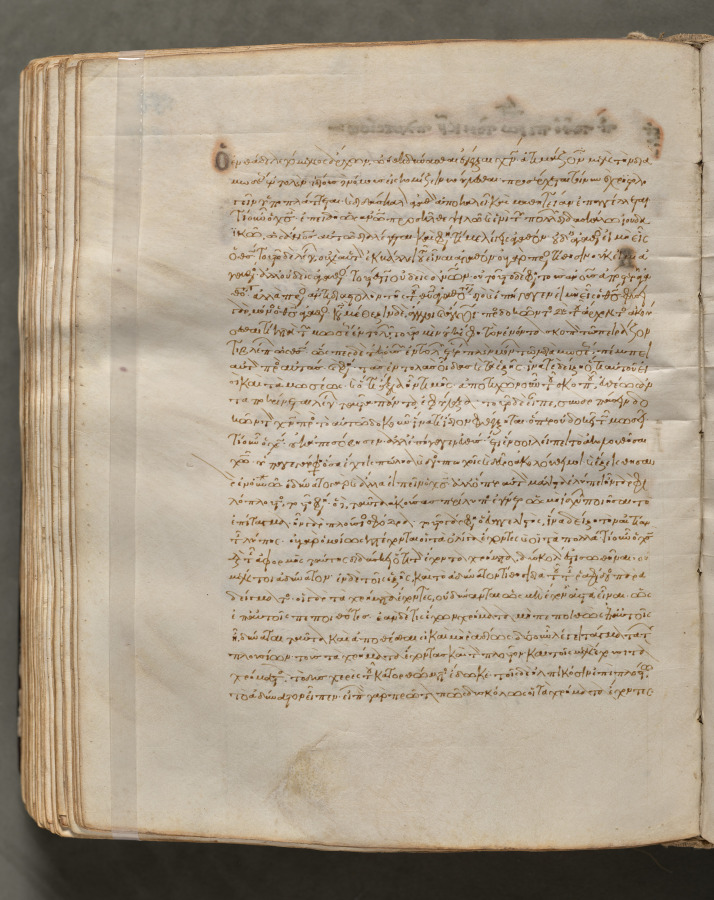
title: Text, folio 291 (verso), from a Gospel Book with Commentaries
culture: Byzantium, Constantinople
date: c. 1000–1100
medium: ink, tempera, and gold on vellum; leather binding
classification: Bound Volume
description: Each of the four gospels in this book opens on a page with brilliantly illuminated borders depicting the author of the text as well as birds—principally peacocks, symbols of the immortality of the soul—and fountains, representing the fountain of life and the salvation of the soul. This volume consists of 428 leaves with texts in Greek. Its level of sophistication suggests that it was probably written and decorated in a monastery in Constantinople.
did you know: Gospel books were carried in procession through Byzantine churches.